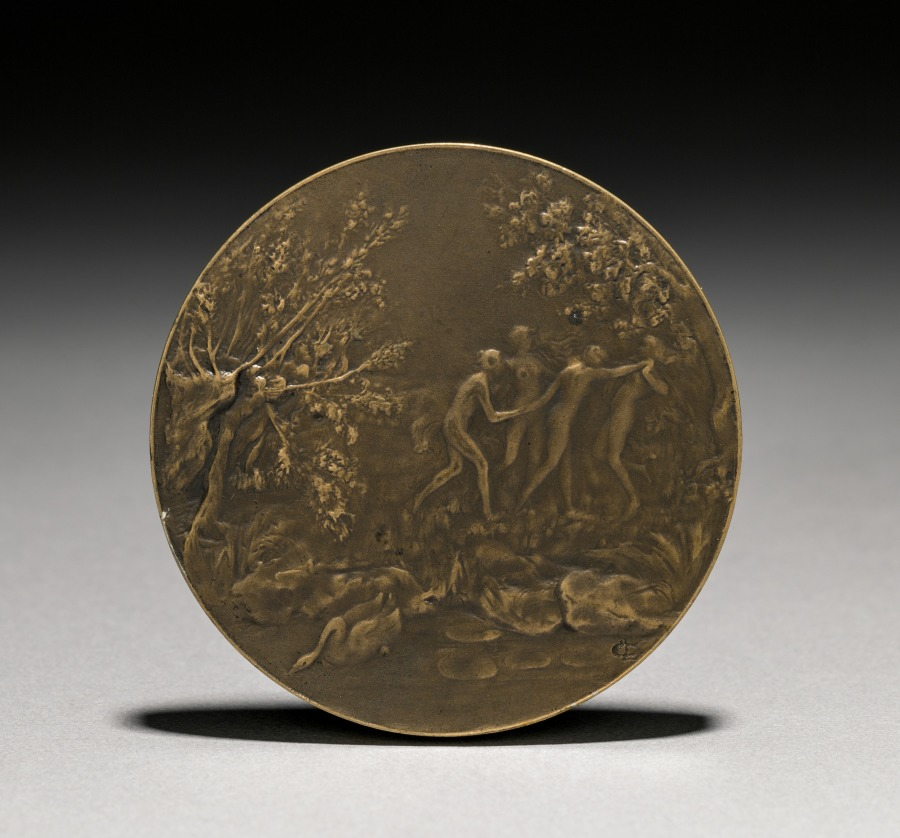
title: Medallion, "Dancing Nude"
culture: France, 19th century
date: 1800's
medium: bronze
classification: Metalwork